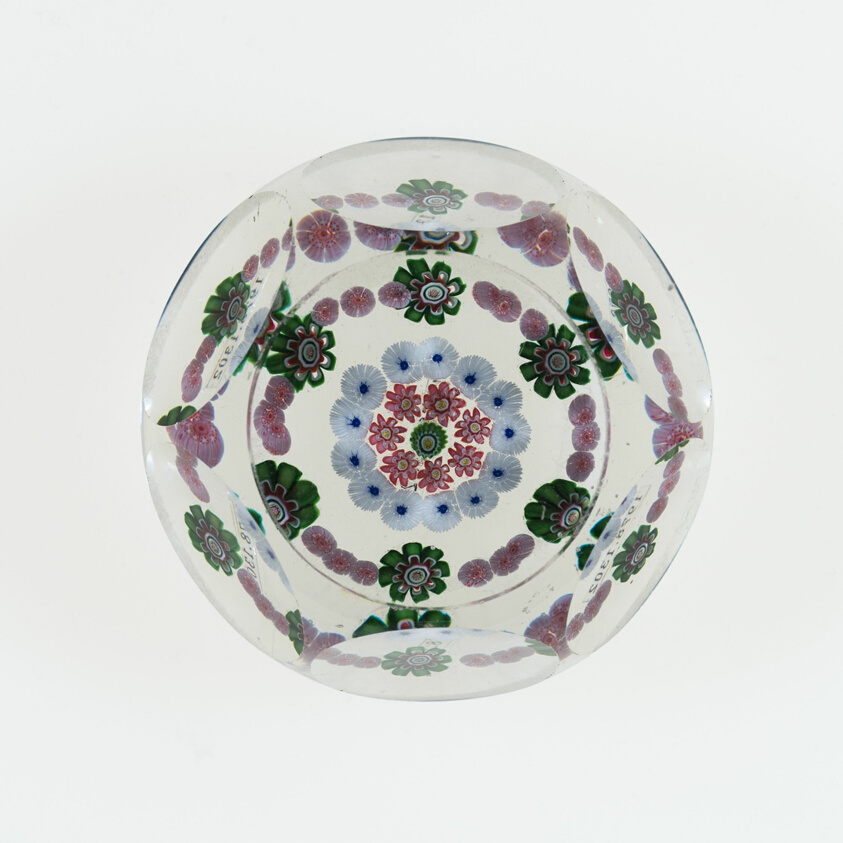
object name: Glass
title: Paperweight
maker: Clichy Glassworks (Cristalleries de Clichy); Clichy, France, 1837-1885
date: 19th century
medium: Glass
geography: Clichy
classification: paperweight; millefiori; european decorative arts; glass